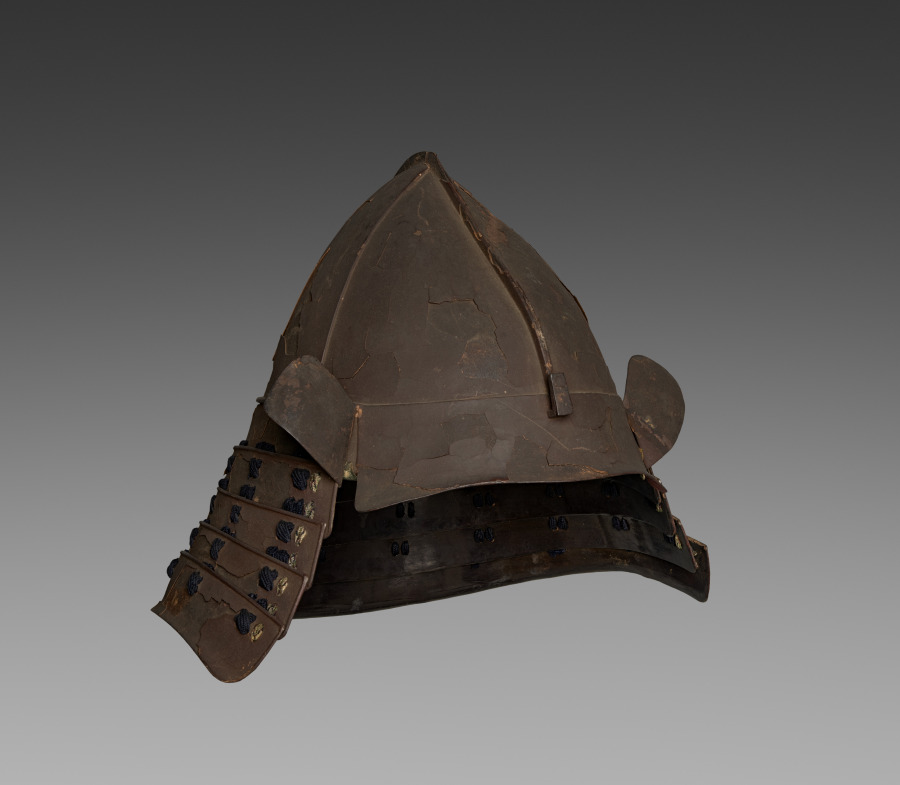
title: Helmet (Kabuto)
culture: Japan, Edo period (1615–1868)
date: 1615–1868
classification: Arms and Armor